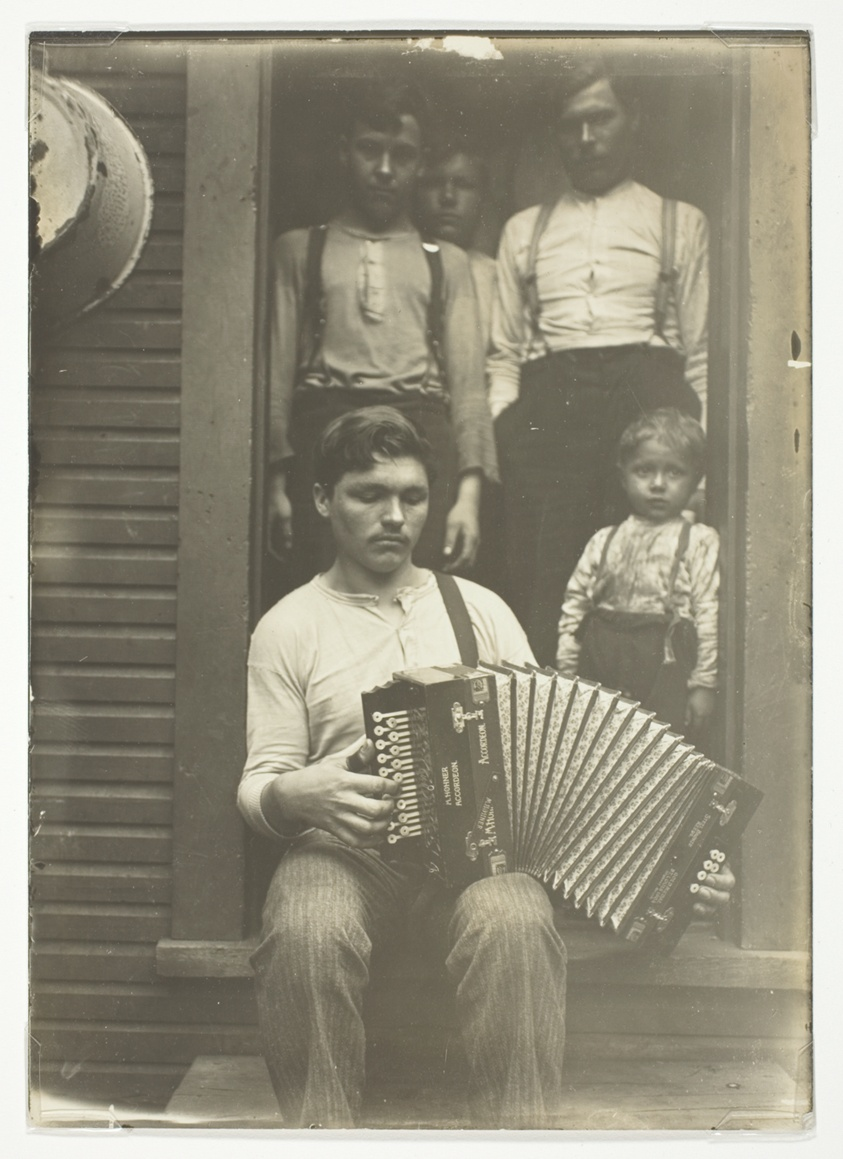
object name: Photograph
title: Slovak Steel Worker in the Pittsburgh Region Relaxes after Supper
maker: Lewis Wickes Hine (American, 1874–1940)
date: 1909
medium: Gelatin silver print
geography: United States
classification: gelatin silver (developing-out-paper) pr; photographic process; photography; photograph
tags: Collected by Hugh Edwards